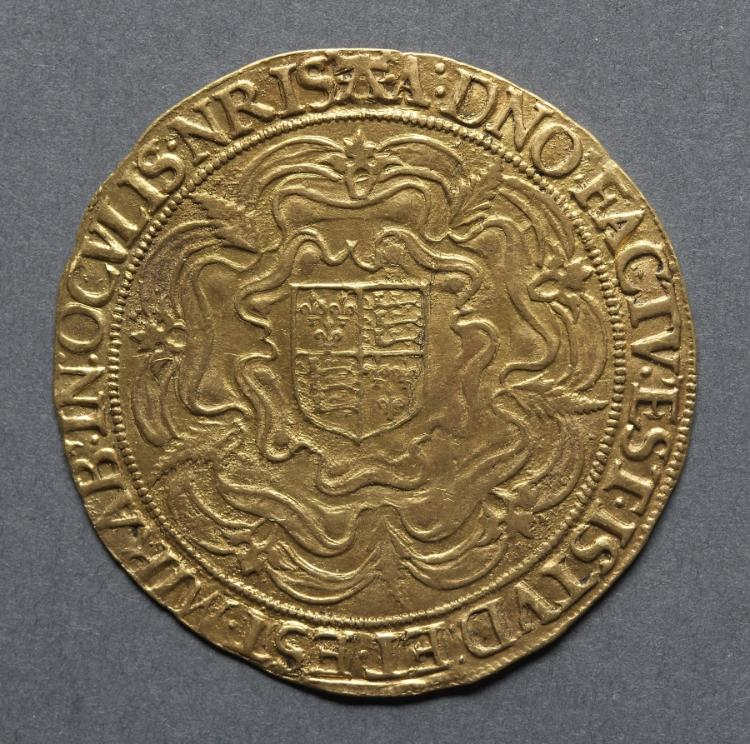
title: Sovereign of Thirty Shillings (reverse)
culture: England, Elizabeth I, 1558-1603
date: 1583–1603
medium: gold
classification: Coins